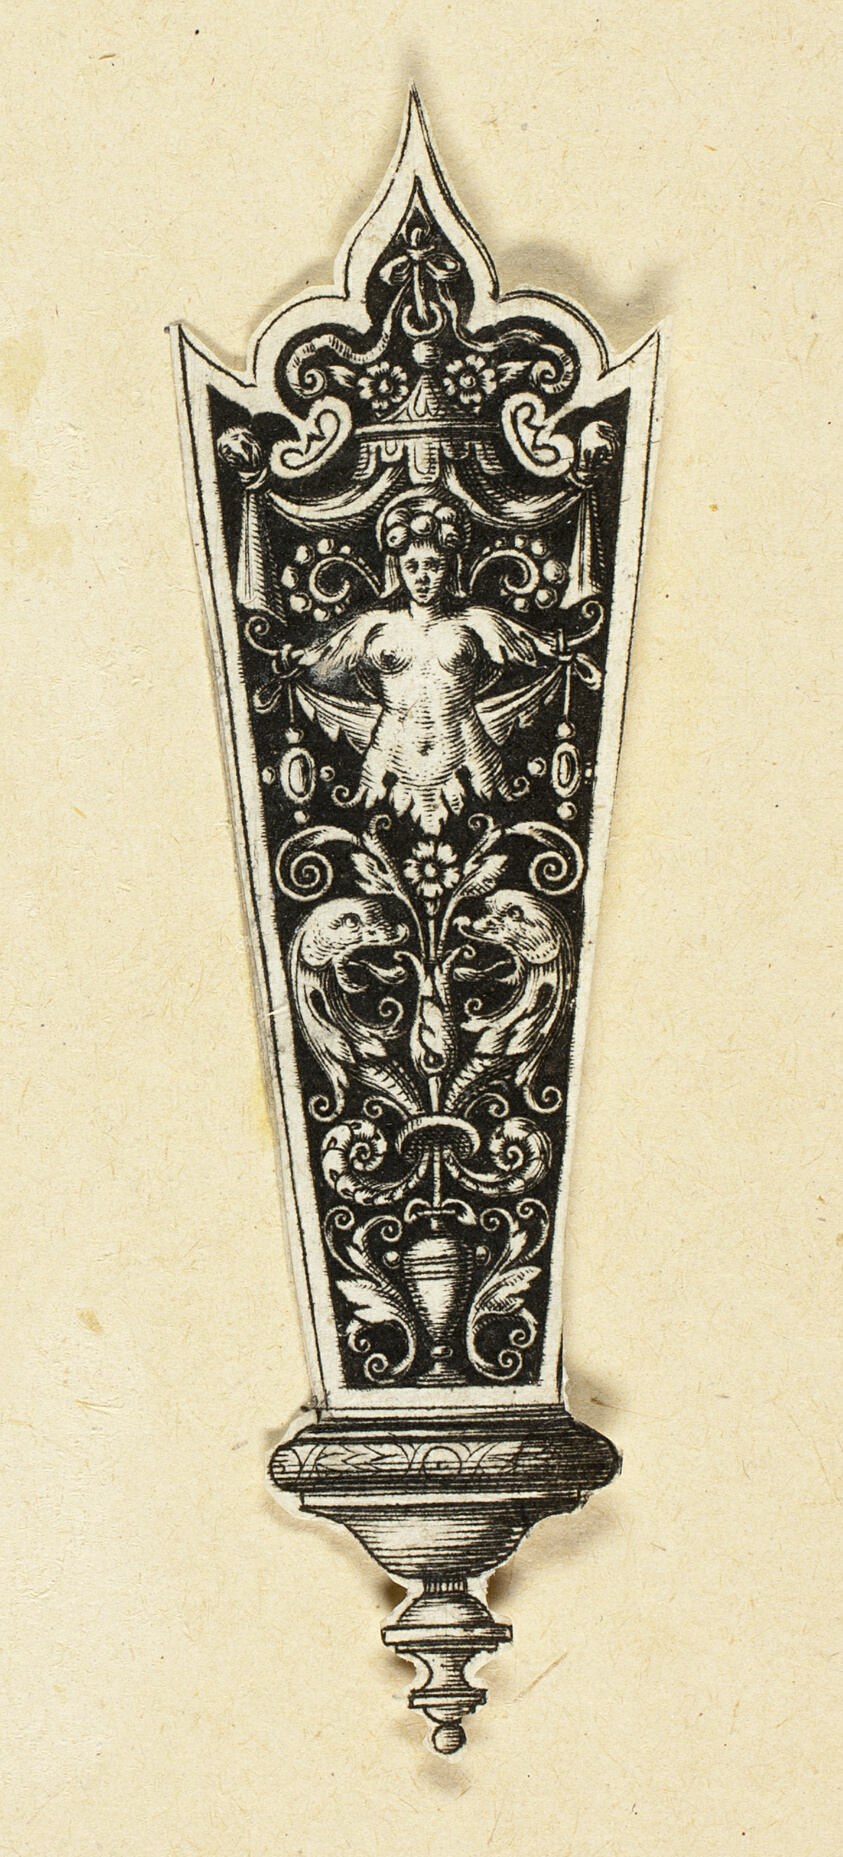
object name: Print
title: Ornamental Design for Knife Handle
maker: Theodor de Bry (Flemish, 1538–1598)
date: c. 1588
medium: Engraving in black on ivory laid paper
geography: Flanders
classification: engraving; paper; print; prints and drawing